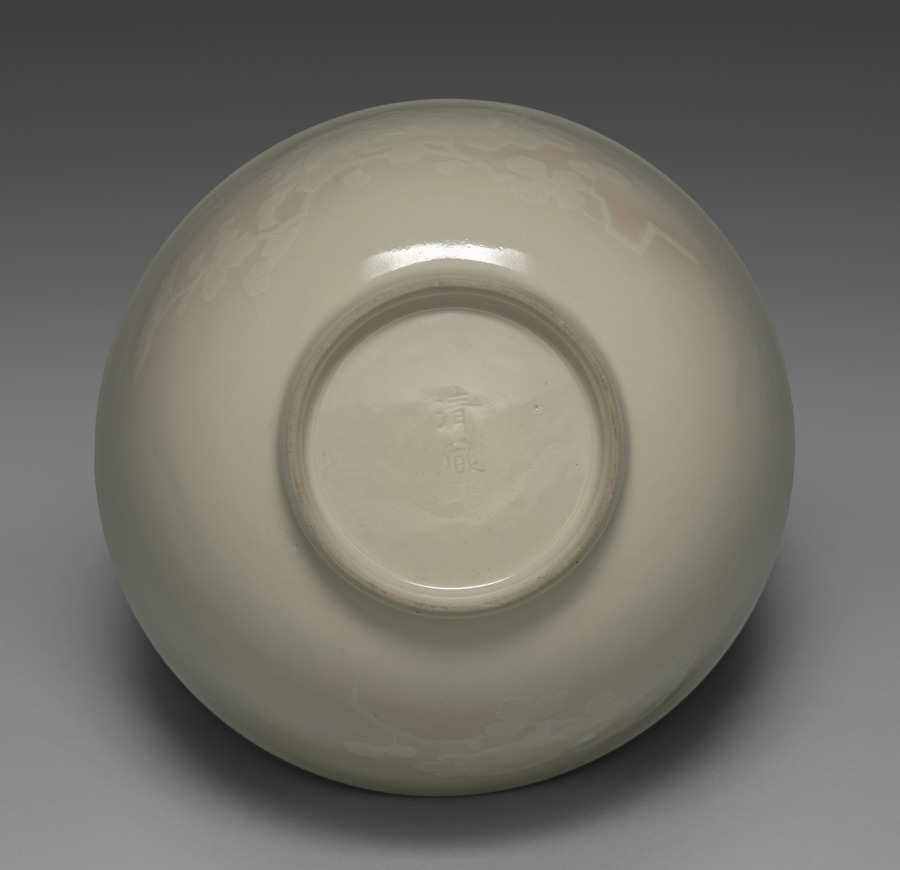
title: Sweets Bowl with Chrysanthemums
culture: Japan, Taishō period (1912–26) or Shōwa period (1926–89)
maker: Seifū Yohei IV (Japanese, 1872–1951)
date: 1914–46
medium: Porcelain with in-glaze and underglaze color and molded design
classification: Ceramic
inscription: 清風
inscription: 成山清風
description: Sweets bowls hold the confections enjoyed when drinking tea. This bowl and CMA 2022.207 offer an important lesson in appreciating Yohei IV’s ceramic practice, for while they have the same design and shape and are made with the same materials, the execution of the pieces makes them entirely different upon close inspection, thereby demonstrating the range of possible production results from a single template. Each bowl has the same composition of two different types of chrysanthemum flowers, one with long, slim, knifelike petals and the other with short, rounded, multilayered petals, shown running around its surface in low relief. The centers of the flowers are painted with yellow under the glaze. Yohei III formulated a number of new underglaze colors during his career, and this is likely one of them. The storage box lid provides abbreviated descriptions of the complex processes used in the surface decorations. It identifies the bowl inside as “Sweets dish with picture of chrysanthemum in kanpakuyū.” The box lid has on its exterior the seal reading “Seizan Seifu” 成山清風, which includes Yohei IV’s style name, but no signature. Instead, a signature is found on the interior of the box lid, accompanied by another seal, this time a gourd-shaped seal reading “Seifu.” The ink inscriptions are in a mode closer to formal script. This bowl, with the signature on the inside of the box lid, stands out for a distinctively bubble-filled glaze with a heavier pink effect, as well as more noticeable yellow at the flowers’ centers and deeper carving in the relief decoration. The design has crept much closer to the rim. A closer look at the delineation of the flower petals reveals that the designs differ at times with respect to which petals appear in front or behind others. The centers of the bases of both bowls are incised with “Seifu” in a manner matching many other works by Yohei IV, although there are slight differences. As one might expect from the other differences in the bowls, the characters on the base of the subtle bowl, CMA 2022.207, are gentler, finishing in a tapering out of the strokes. The strokes on this bold bowl end in triangular pinheads.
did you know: Here Yohei IV used his father’s kanpakuji formula, with underglaze pink for the gradated wash of color surrounding the flowers.